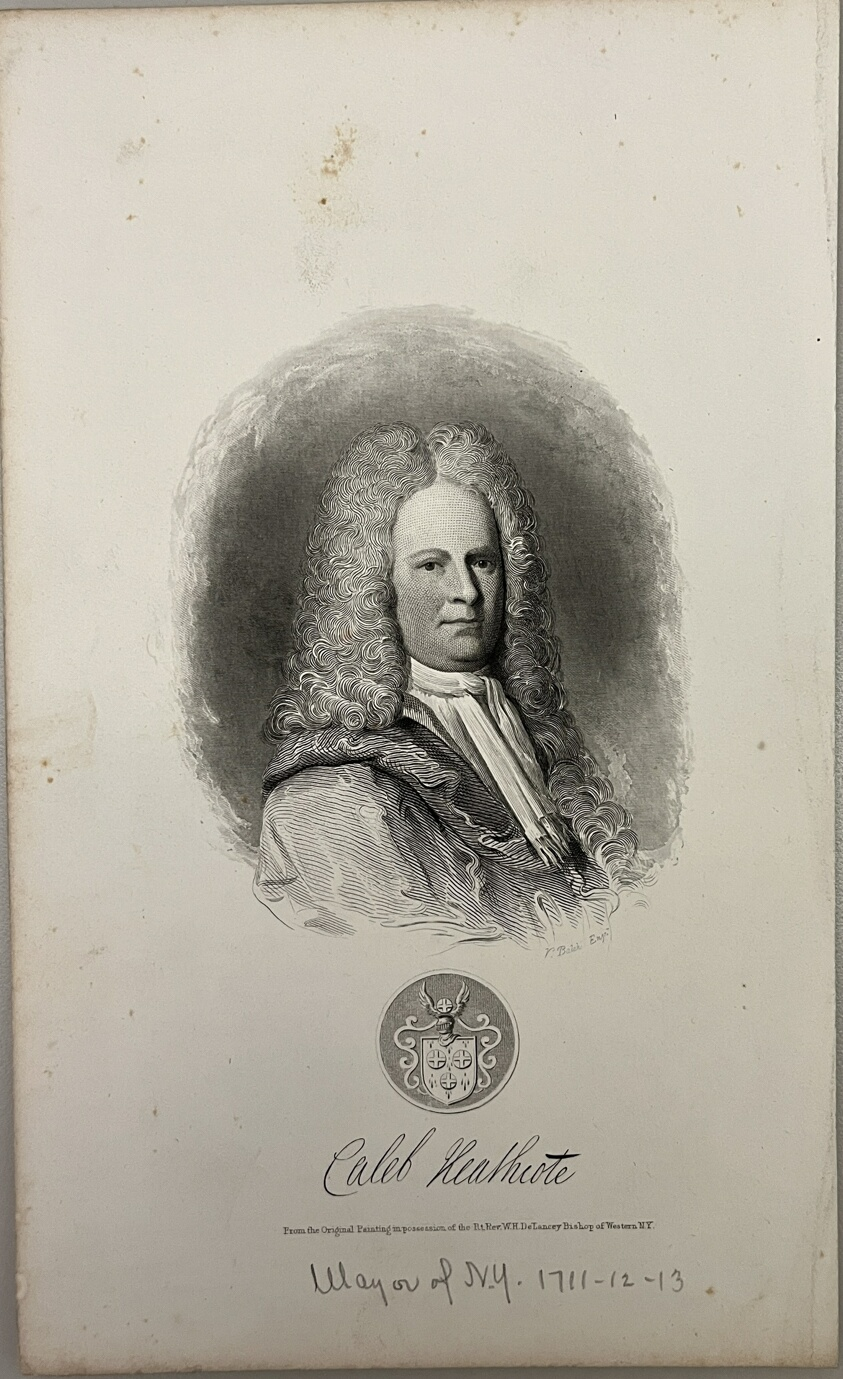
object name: Print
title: Caleb Heathcote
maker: Vistus Blach (1799-1884); after Heathcote Master (American, 19th century)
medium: Etching on paper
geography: United States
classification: reproduction; print; prints and drawing